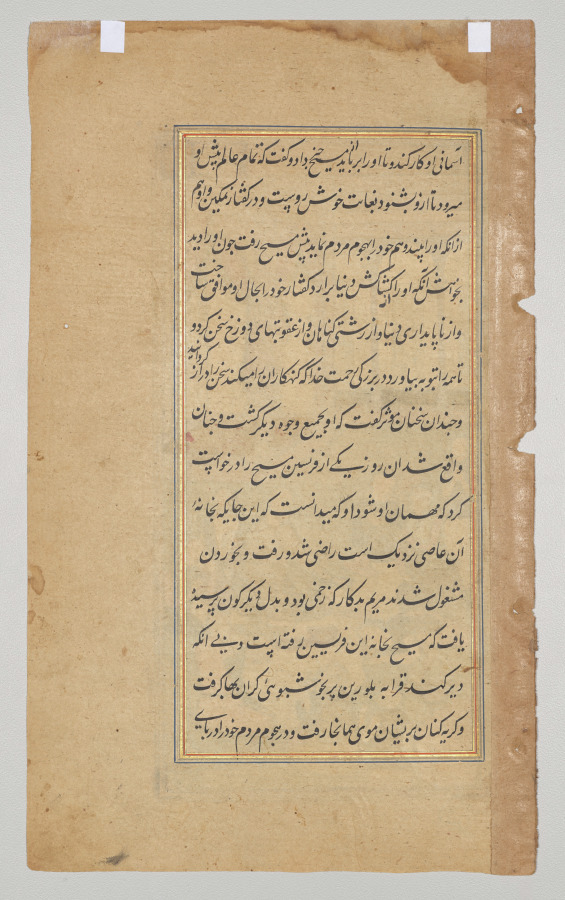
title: Text page from a Mirror of Holiness (Mir’at al-quds) of Father Jerome Xavier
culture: Mughal India, Allahabad, made for Prince Salim (1569–1627)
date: 1602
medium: Ink and gold on paper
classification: Manuscript